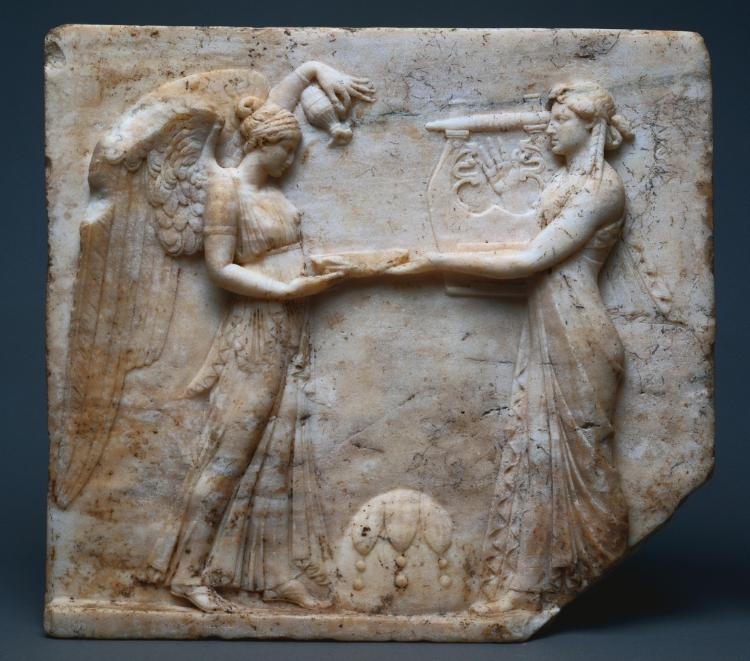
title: Relief of Apollo with Nike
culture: Italy, Roman, Augustan period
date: 27 BCE–14 CE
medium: Greek marble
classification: Sculpture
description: This is a typical example of Neo-Attic work, a school that revived the Archaic style of the late sixth century BC. The elongated figures and mannered gestures are typical of this school.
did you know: Between the figures is a draped egg-shaped stone known as an omphalos, the metaphorical center of the world.